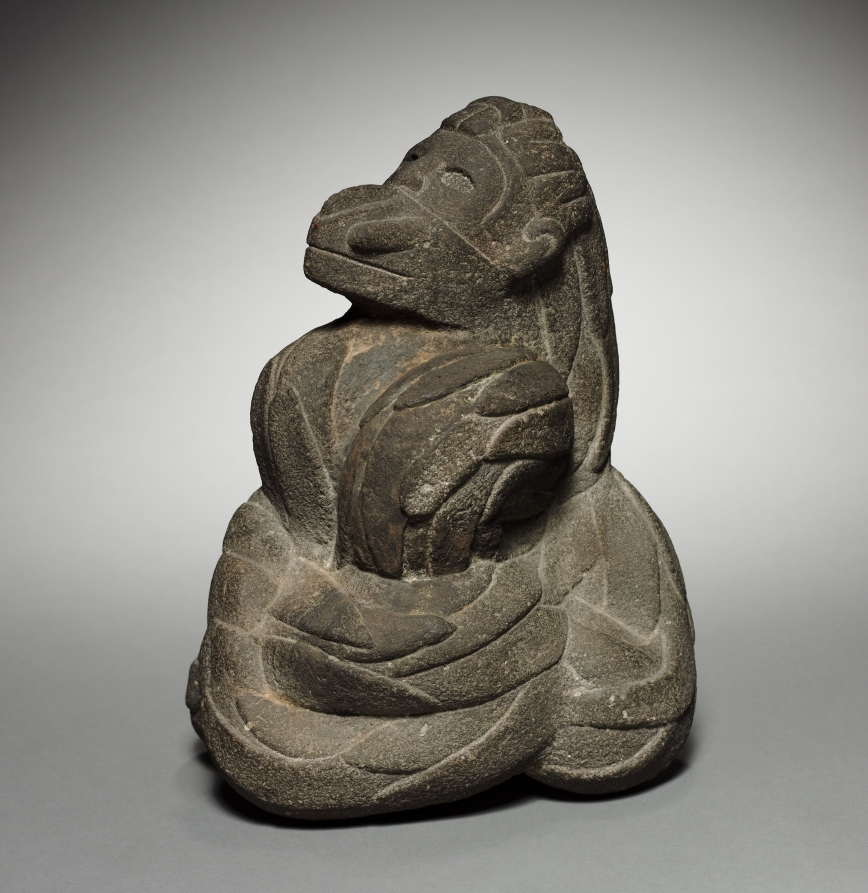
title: Feathered Serpent (Quetzalcoatl)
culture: Central Mexico, Aztec or modern, Post-Classic Period or modern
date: 1325–1521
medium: stone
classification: Stone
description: The museum bought this sculpture in 1941, when study of ancient American arts was in its infancy. It has many odd features, a few perhaps revealing an attempt to make the subject—the Aztec deity Quetzalcoatl (Feathered Serpent)—palatable to modern viewers. But it cannot absolutely be declared fake because some real Aztec sculptures are unusual. Analysis of the surface so far provides no help. Especially odd is the arrangement of the coils into bulges that suggest the pectorals, knees, and buttocks of a human body, as though the sculpture represents a human in a serpent costume. Real Aztec sculpture usually portrays the serpent's dangerous body more realistically. Also, the mouth mask—the insignia of a wind deity related to Quetzalcoatl and, thus, perhaps appropriate—is much larger in genuine sculptures. This suggests that, because the mask and its authentic proportion are strange to our eyes, a forger scaled it down. Other uncommon features include the incomplete carving of the ears, the fact that the human head does not emerge from a serpent's mouth, and more.